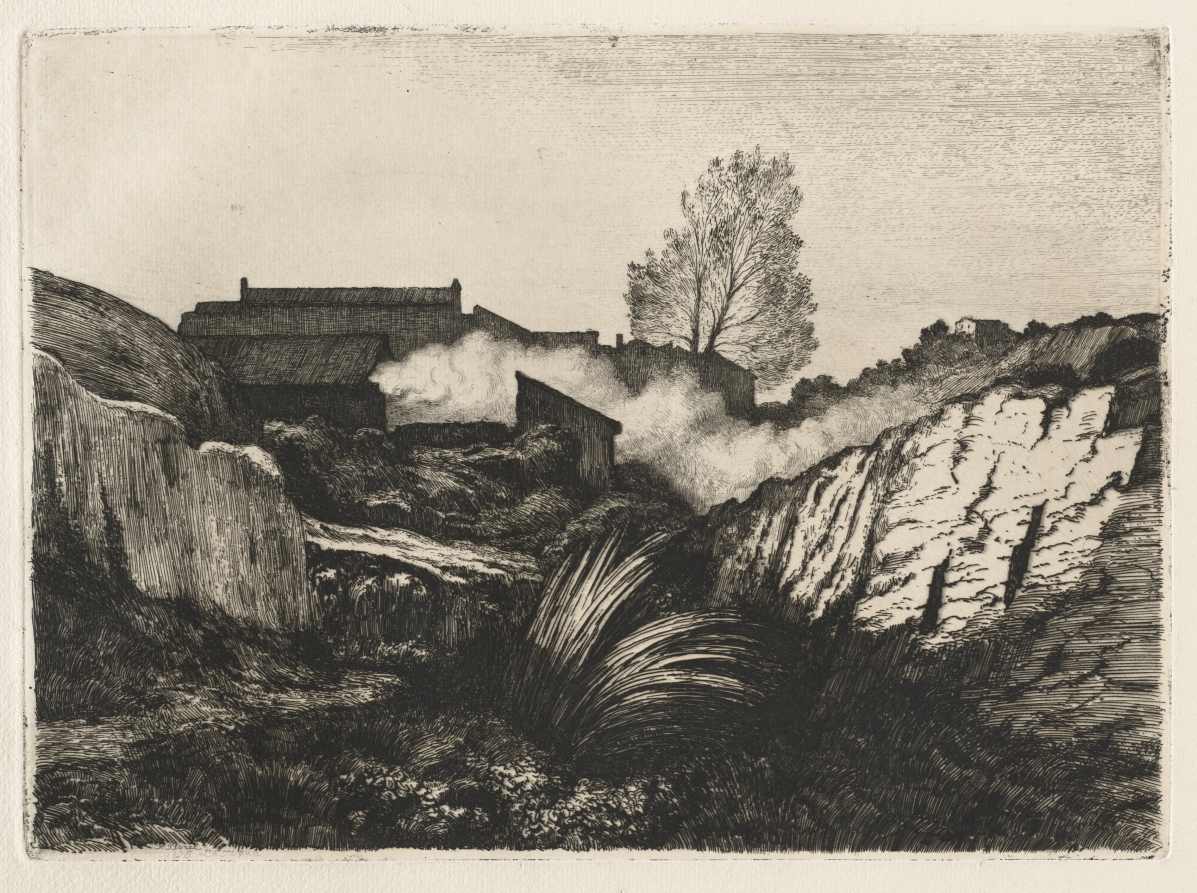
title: L'Estaque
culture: France, 19th century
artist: André Paul Borel (French, 1828–1912)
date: 1878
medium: etching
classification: Print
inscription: signed, dated and titled, lower left, in plate: P. Borel 1878 L'Estaque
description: L’Estaque, a suburb of Marseilles in Provence, attracted numerous artists who admired its hilly terrain, including Paul Cezanne, Pablo Picasso, and Georges Braque.